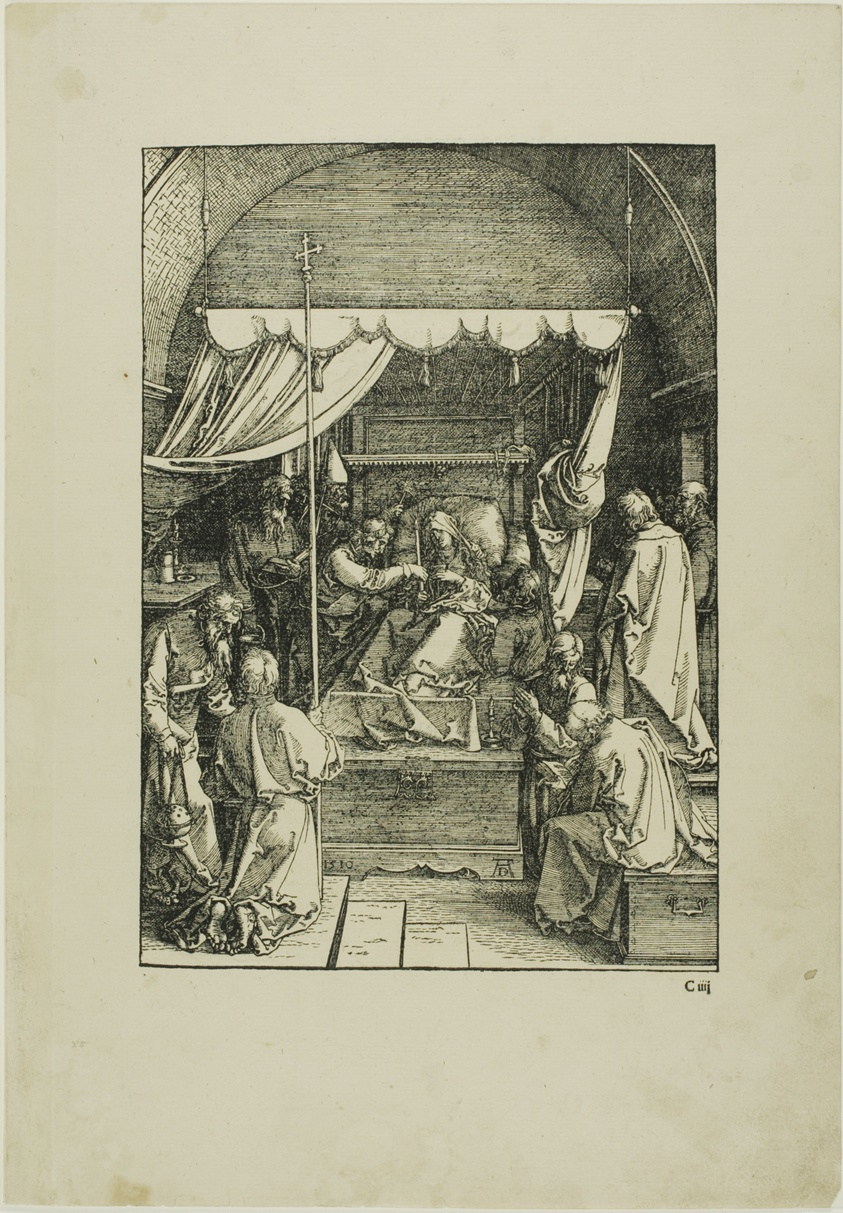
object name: Print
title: The Death of the Virgin, from The Life of the Virgin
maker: Albrecht Dürer (German, 1471-1528)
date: 1510, published 1511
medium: Woodcut in black on tan laid paper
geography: Germany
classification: woodcut; print; prints and drawing; paper